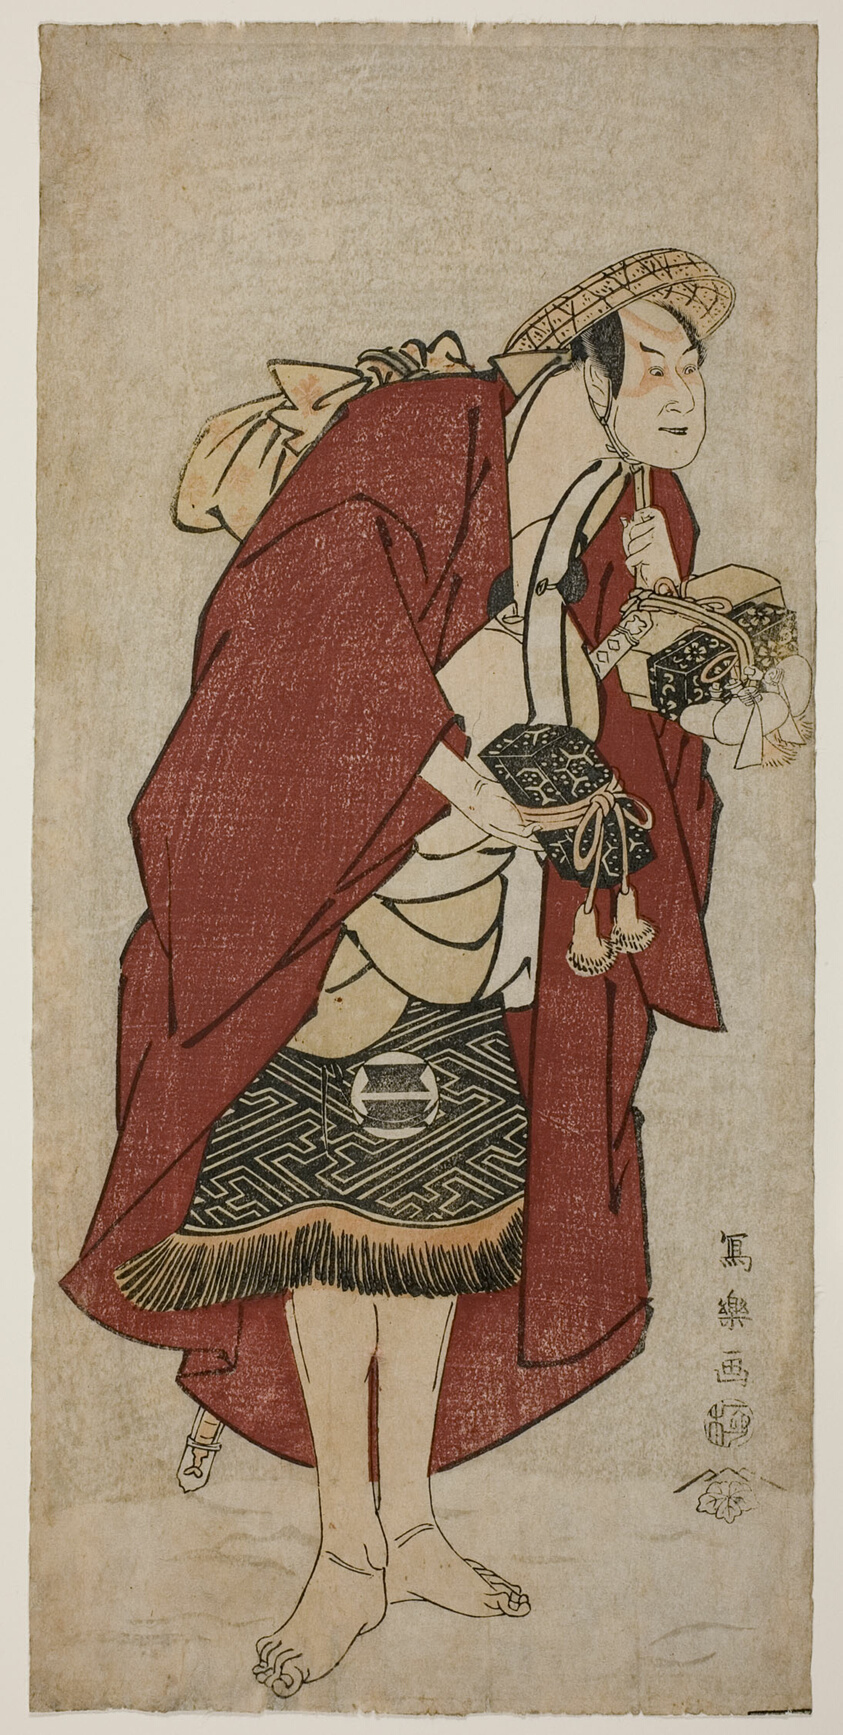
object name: Print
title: The Actor Sakata Hangoro III as the Groom Abumizuri no Iwazo in Koriyama, Actually Kurisaka Taro Tomonori (SAndai-me Sakata Hangoro no Koriyama no Umakata Abumizuri no Iwazo, jitsuwa Kurisaka Taro Tomonori)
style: Japanese (culture or style)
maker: Toshusai Sharaku 東洲斎 写楽; Japanese, active 1794-95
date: 1794 (Kansei 6)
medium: Color woodblock print; hosoban, nishiki-e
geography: Japan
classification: woodblock print; print; asian art